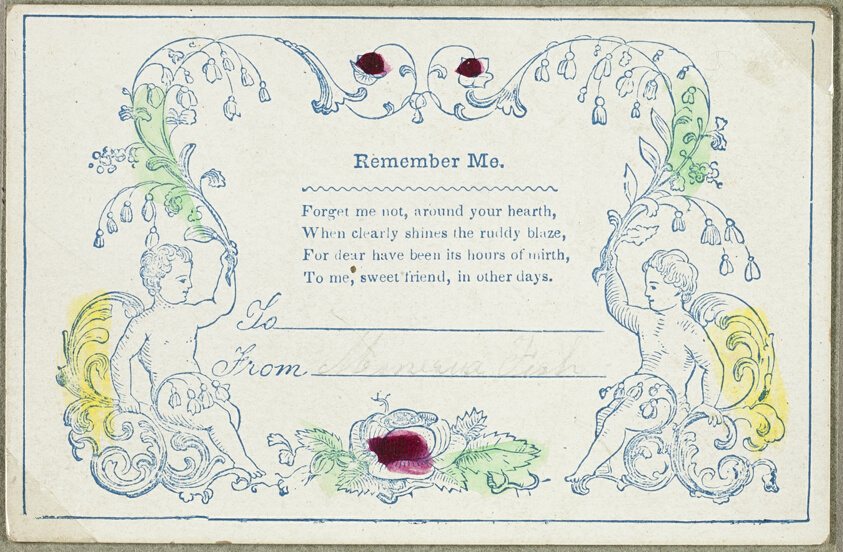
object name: Print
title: Remember Me (valentine)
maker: Unknown Artist; American or English, 19th century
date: c. 1830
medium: Engraving in blue ink with hand-coloring and traces of graphite on ivory card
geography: United States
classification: valentine; prints and drawing; print